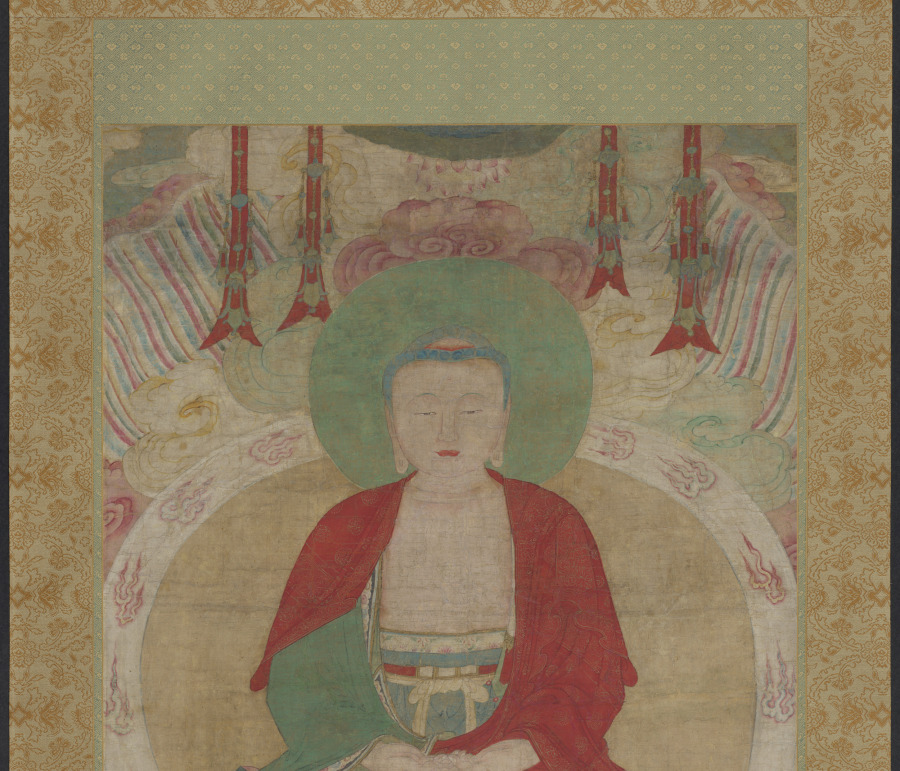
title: Seated Amitābha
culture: Chinese, Ming dynasty (1368-1644)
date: late 1500s–early 1600s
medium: hanging scroll; ink and color on silk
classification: Painting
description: This magnificent Buddha, called Amitābha (literally, “infinite light”) is seated on a lotus pedestal with both palms facing up over crossed legs, suggesting that it is in deep meditation. In contrast to the richly ornamented throne on which the Buddha is seated, the figure itself is devoid of any jewelry or decorative attributes, emphasizing its enlightened status and detachment from worldly affairs. The lion head in the center of the pedestal is a motif from Central Asia, which can also be seen in the halo or nimbus of Chinese Buddhist stone steles.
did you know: Originally, this scroll was acquired by the museum as a Korean work, but has now been tentatively reattributed as Ming period Chinese.